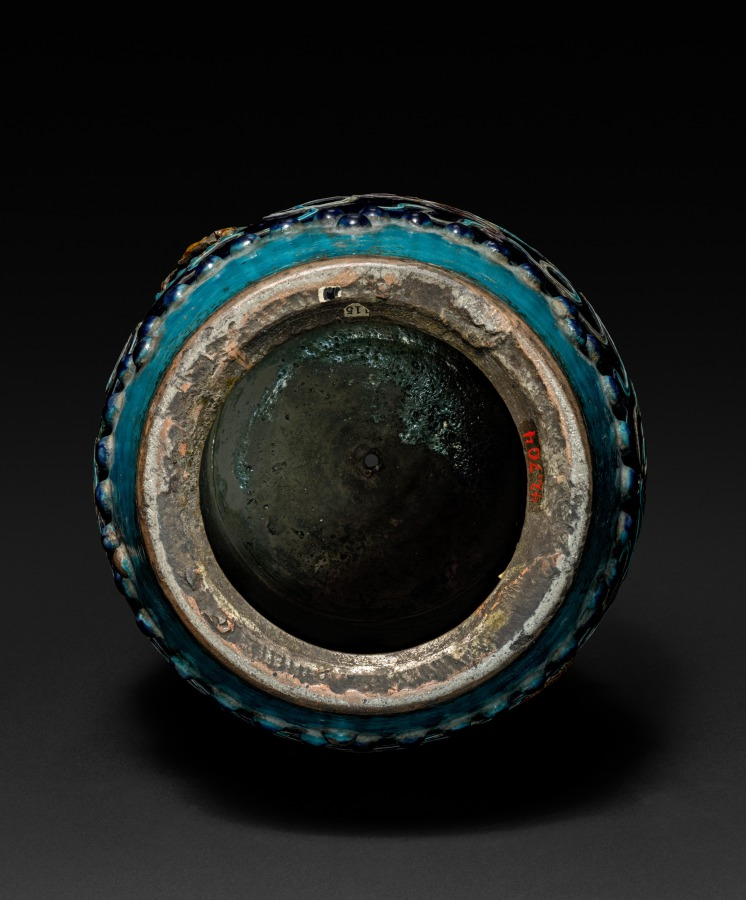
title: Garden Seat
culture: China, Jiangxi Province, Ming dynasty (1368–1644)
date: 1368–1644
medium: porcelain, Fahua ware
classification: Ceramic